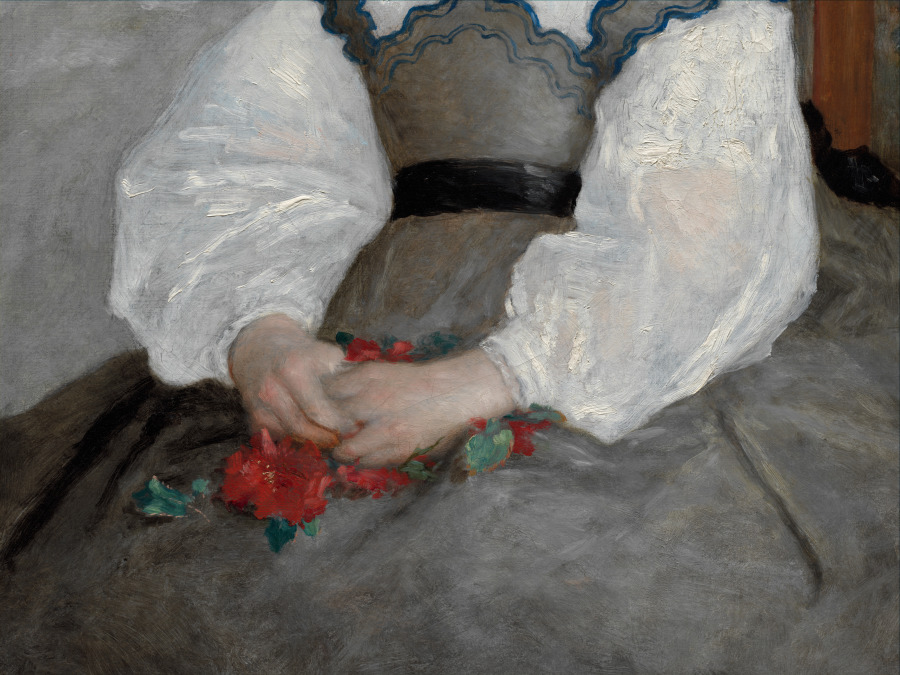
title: Romaine Lacaux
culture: France, 19th century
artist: Pierre-Auguste Renoir (French, 1841–1919)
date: 1864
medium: oil on fabric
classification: Painting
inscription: Signed center right: a. renoir / 1864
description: This painting may be Renoir's earliest signed canvas. Its sensitive display of color and light communicates an ideal of delicate, youthful beauty. The luminous tones of the background drapery and of the child's white blouse result from the artist's careful observation of reflected light and color on translucent materials. The delicate nuances of color, particularly in the young girl's face, reveal Renoir's previous training as a decorator of porcelain. He painted this portrait, commissioned by the vacationing Lacaux family, during his stay at an artist's colony in the village of Barbizon, near Paris.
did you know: The son of a poor tailor from Limoges, Renoir began his artistic career at age 13 as an apprentice to a porcelain painter.